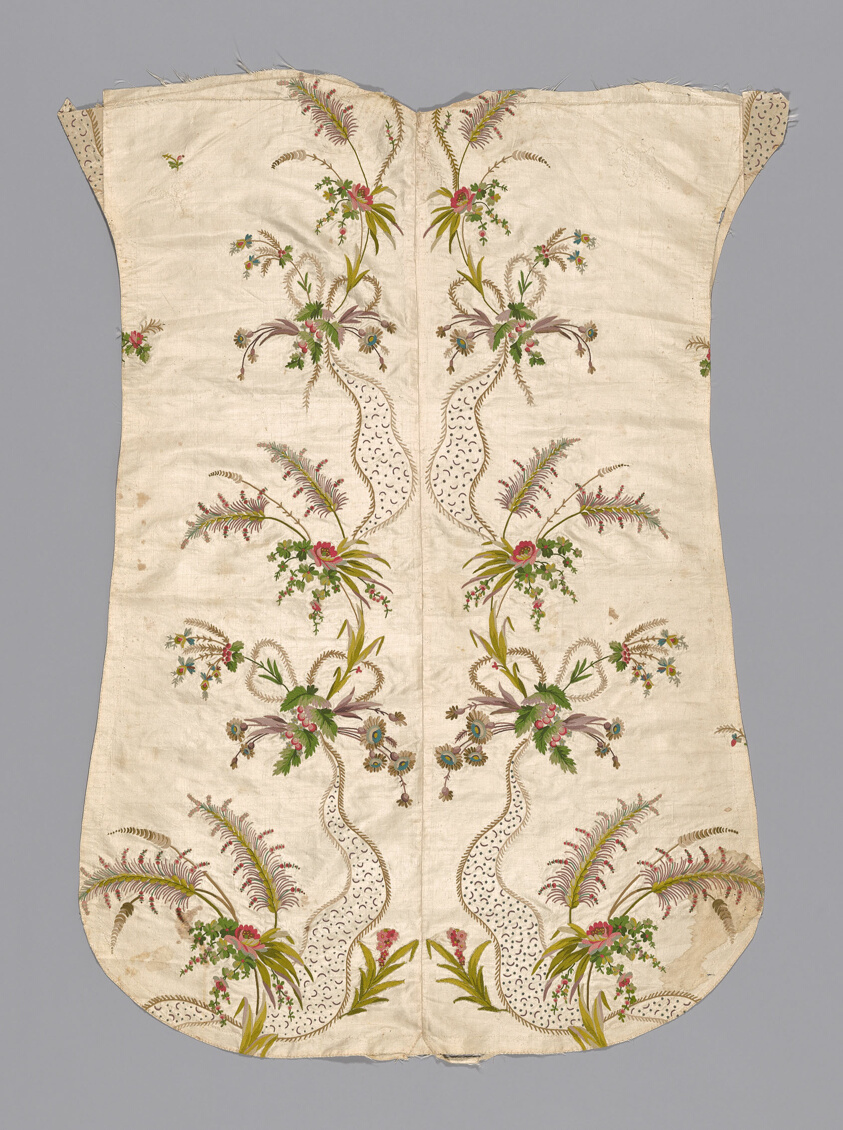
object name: Textile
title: Panel (Possibly a Chasuble Back)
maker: France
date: 1725/75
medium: Silk, plain weave embroidered with silk in machine-made chain stitches (tambour work); French knots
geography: France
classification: textile; needlework (visual works); liturgical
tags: flowers, swags